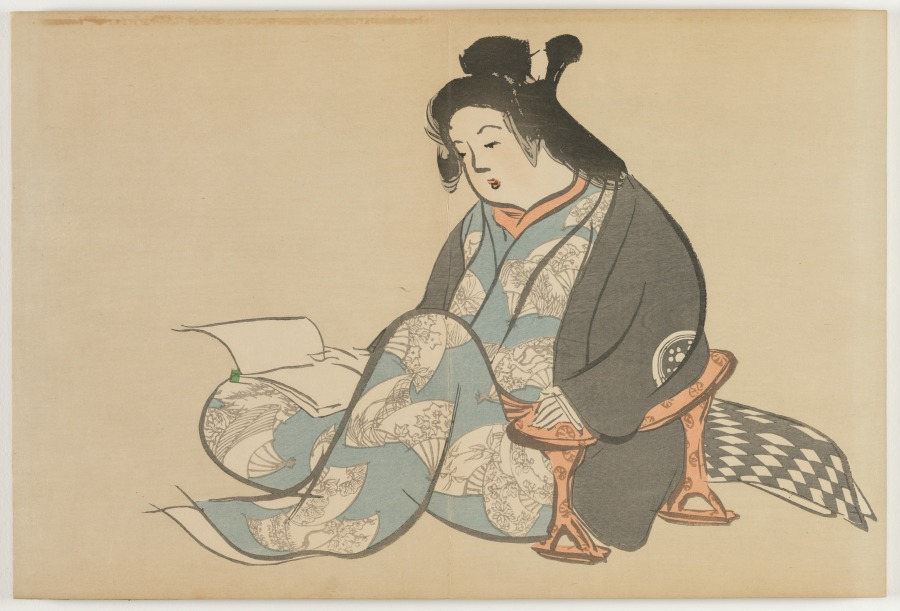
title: Flowers of a Hundred Worlds (Momoyogusa): Idleness (Tsurezure)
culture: Japan, Meiji period (1868–1912)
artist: Kamisaka Sekka (Japanese, 1866–1942)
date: 1909–10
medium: color woodcuts with gold and silver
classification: Bound Volume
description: This print from a set of three woodblock printed albums displays the graphic design prowess of Kamisaka Sekka. The images were first distributed one by one to subscribers to the series but later were reissued in bound form, like this book, for mass consumers. Each print features a vignette taken from nature or Japanese literature. Many of the scenes have a long history in Japan, originating in the 900s or 1000s and having been interpreted by all manner of artists since that time. Sekka’s selections hew closely to precedents from the Rinpa style originated by painter Tawaraya Sōtatsu (c. 1570–c. 1640) and calligrapher Hon’ami Kōetsu (1558–1637).